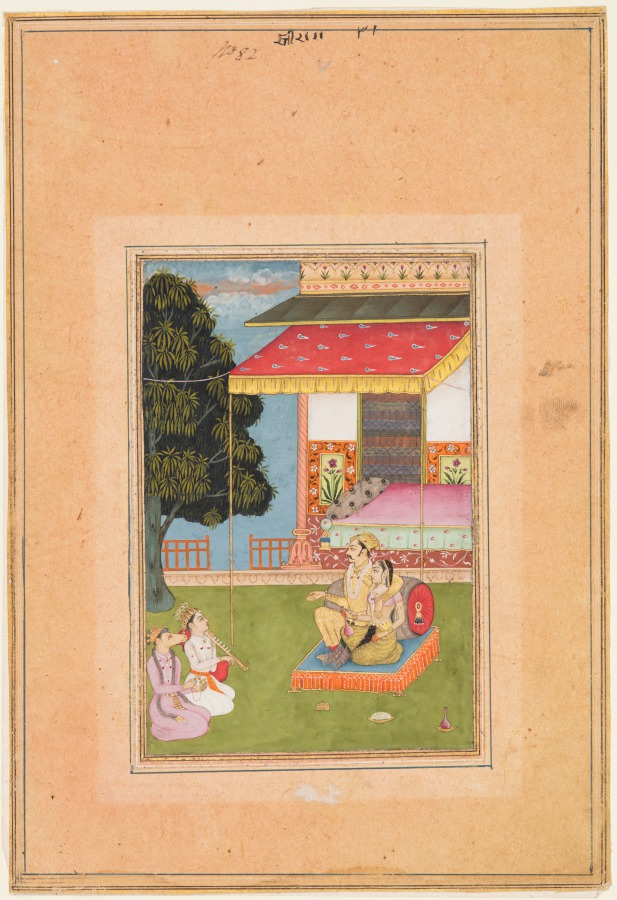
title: Shri Raga, from a Ragamala (Garland of Melodies)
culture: Northwestern India, Rajasthan, Rajput Kingdom of Bikaner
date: 1695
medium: Gum tempera and gold on paper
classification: Painting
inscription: In Nagari on top border ‘srī rāgā’ and Persian number ‘31’. Inscribed ‘śrī rāgā’ in Nagari with Nagari number ‘31’ on verso.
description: Sharing a bottle of wine, the royal couple enjoy the performance of a musician playing a vina and the horse-headed divinity Tumbaru on the cymbals. Tumbaru is a divinity who has the power to increase the prosperity of the realm. This page is from a series that was made on the occasion of Diwali, the Hindu festival of lights.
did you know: The ideal king in this scene is a likeness of the current ruler, Anup Singh (r. 1638–93).